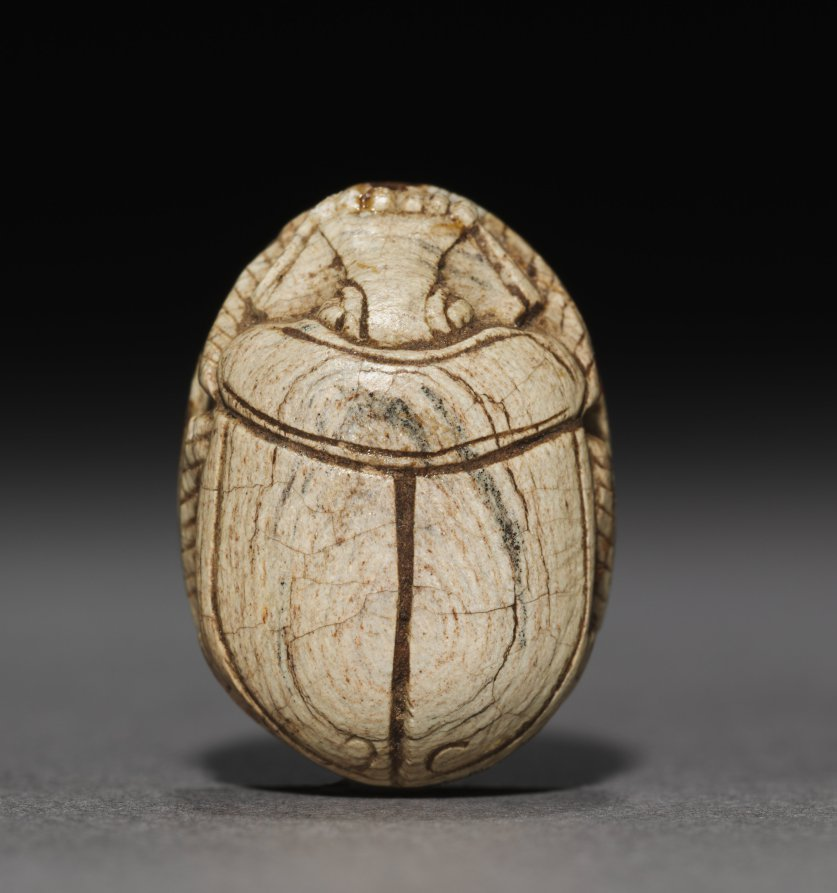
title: Scarab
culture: Egypt, Modern forgery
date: 1900–1914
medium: steatite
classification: Scarabs